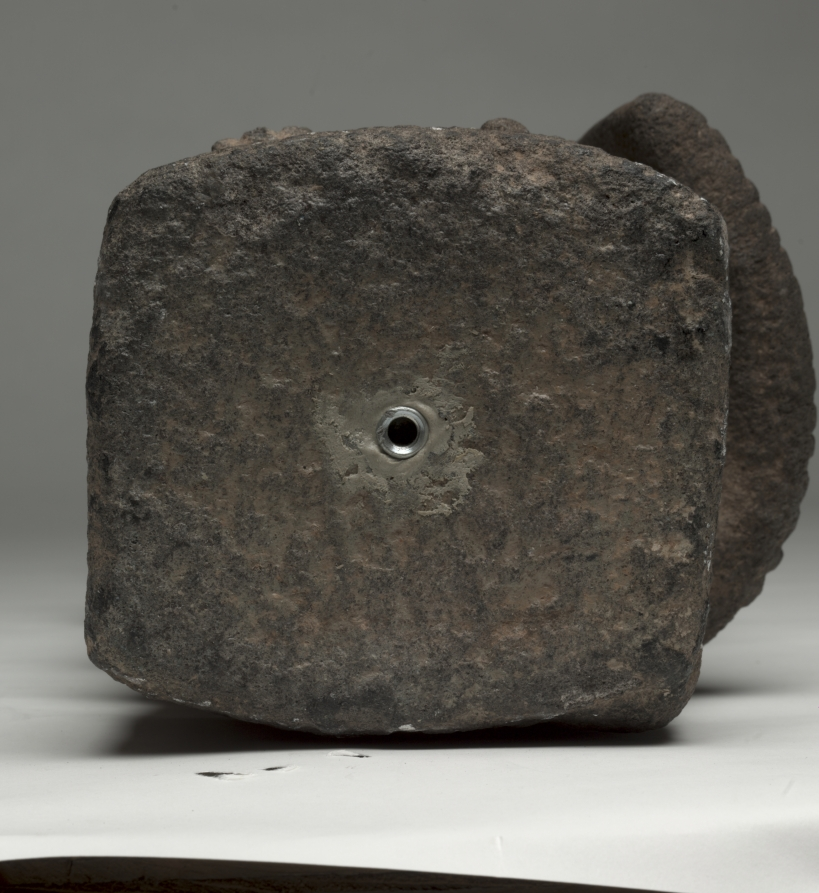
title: Priest-King or Deity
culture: Hittite, North Syria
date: c. 1600 BCE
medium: basalt with bone eyes (left, ancient; right, restored)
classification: Sculpture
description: The Hittites migrated into Anatolia in the 3rd millennium BCE and spoke an Indo-European language, a group that includes Greek, Latin, Persian, Sanskrit, English, and most modern European languages. They were the first ancient people to use iron for weapons. From about 1600–1200 BCE their empire was at its peak, extending from central Anatolia to Syria, and south along the eastern Mediterranean. Their vast empire and interest in commerce enabled the Hittites to spread Mesopotamian ideas and culture throughout the ancient Mediterranean world. This large basalt sculpture is exceptionally rare in depicting a Hittite god or priest-king wearing a horned conical crown, false beard, and long robe. He holds a bowl in his right hand and once held something in his left, perhaps a staff or sword.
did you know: The left eye of the sculpture is the original bone inlay while the right eye is a modern restoration done after the piece was damaged.